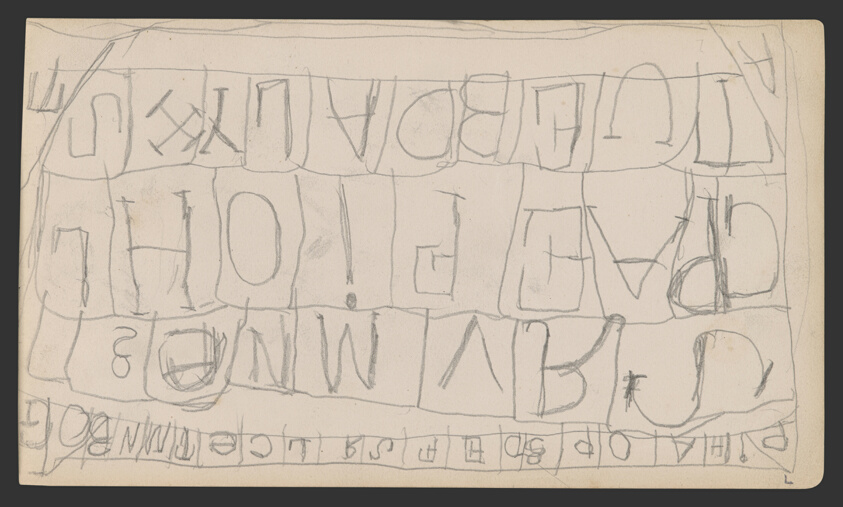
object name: Drawing and Watercolor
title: Sketchbook No. 2 (L'Estaque)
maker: Paul Cézanne; French, 1839-1906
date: 1875–86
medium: Graphite and pen and ink drawings on paper, bound into a book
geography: France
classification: sketchbook; graphite; prints and drawing; paper